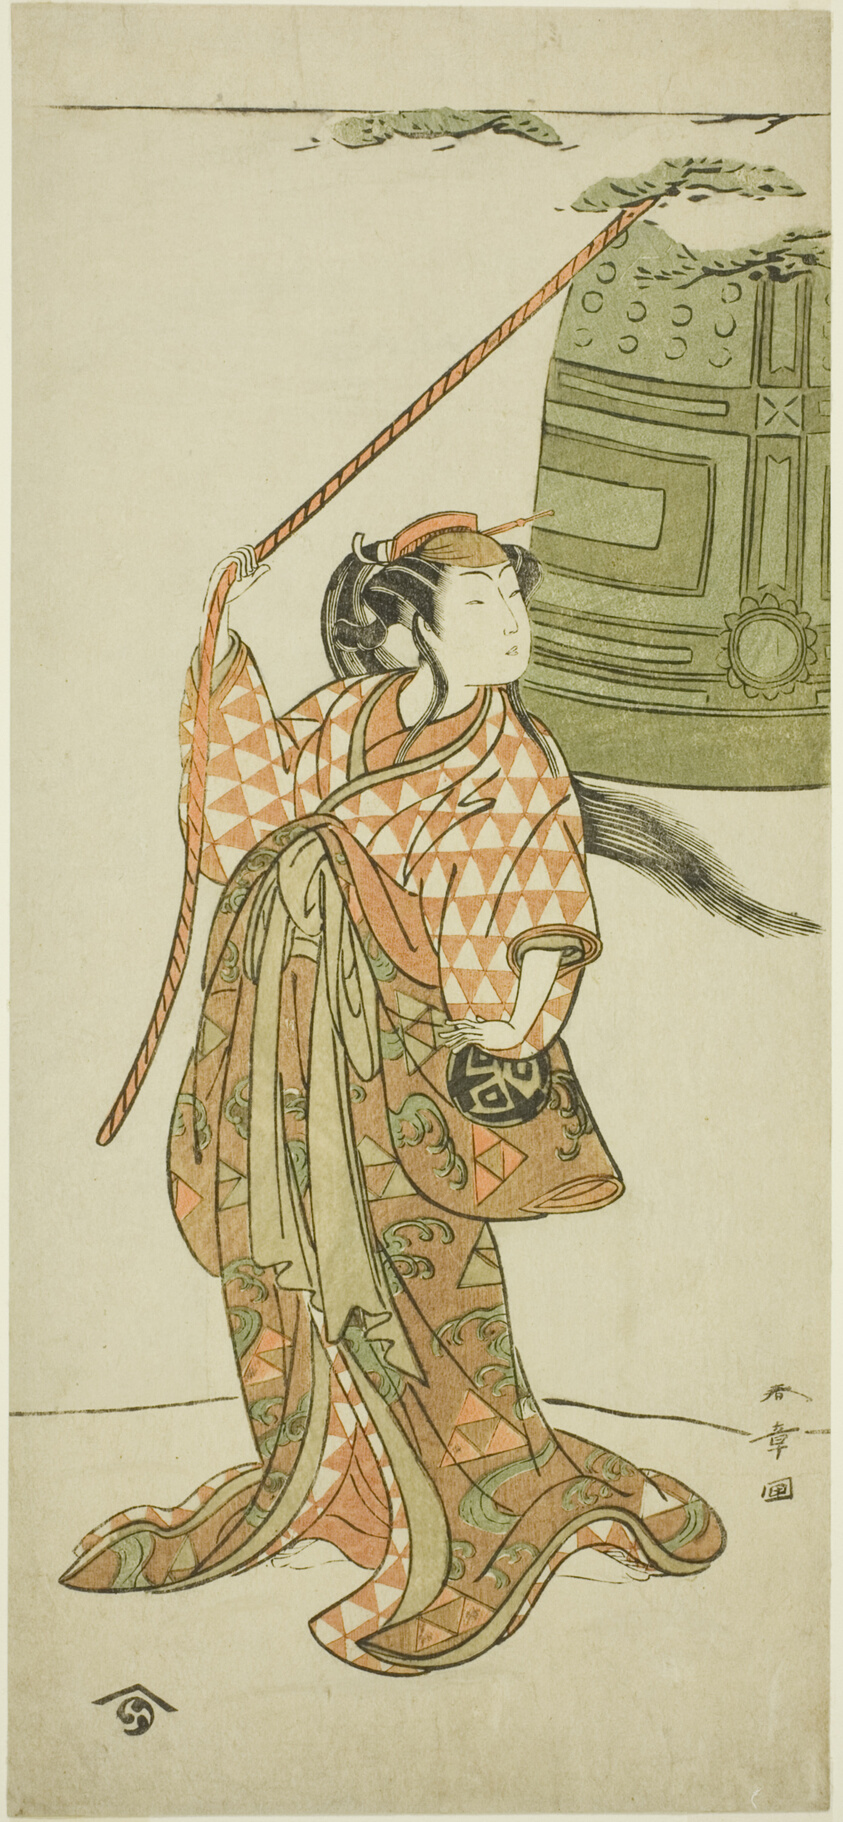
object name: Print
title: Actor Arashi Hinaji I Dancing in “The Maiden at Dojo Temple” (“Musume Dôjô-ji”)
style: Japanese (culture or style)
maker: Katsukawa Shunshô 勝川 春章; Japanese, 1726-1792; Publisher: Nishimuraya Yohachi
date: About 1772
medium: Color woodblock print; hosoban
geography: Japan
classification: woodblock print; print; asian art